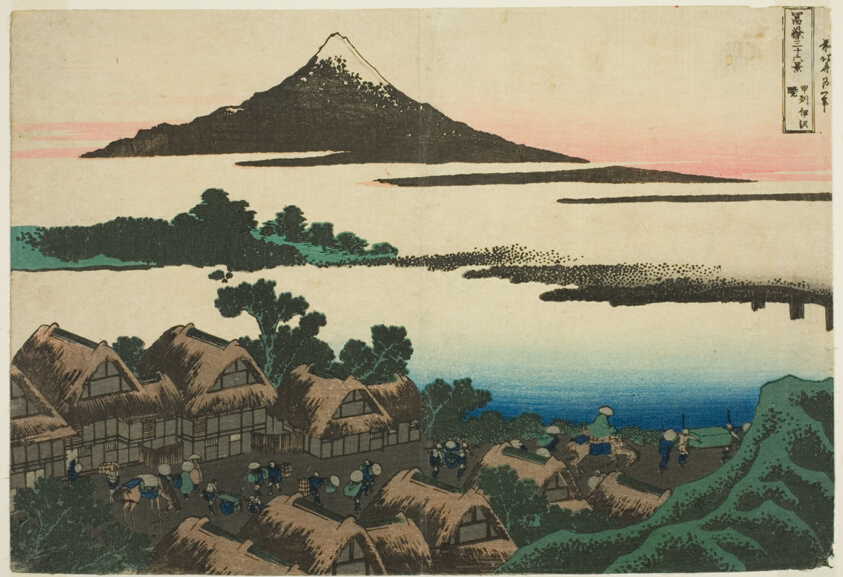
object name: Print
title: Dawn at Isawa in Kai Province (Koshu Isawa no akatsuki), from the series "Thirty-six Views of Mount Fuji (Fugaku sanjurokkei)"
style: Japanese (culture or style)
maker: Katsushika Hokusai 葛飾 北斎; Japanese, 1760-1849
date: c. 1830/33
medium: Color woodblock print; oban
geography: Japan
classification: woodblock print; print; asian art